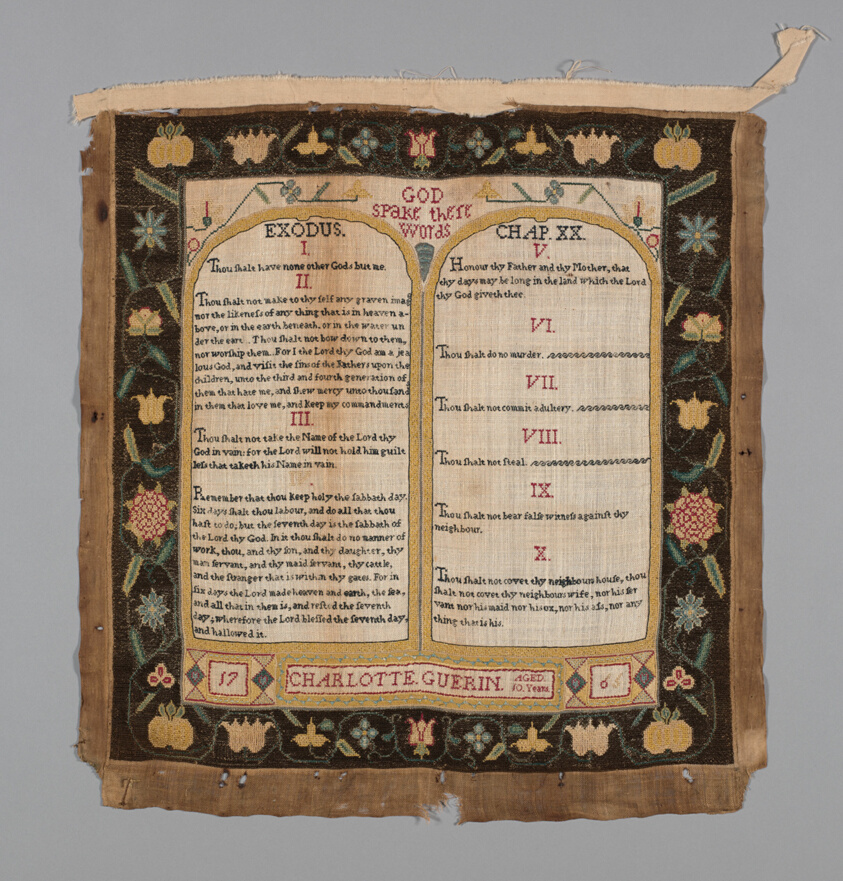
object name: Textile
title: Sampler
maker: Charlotte Guerin (French-Canadian, born 1755/56); Probably Canada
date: 1765/66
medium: Linen, plain weave; embroidered with silk in cross, herringbone, stem, satin, and chain stitches; edged with cotton, plain weave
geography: Canada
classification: textile; needlework (visual works); sampler